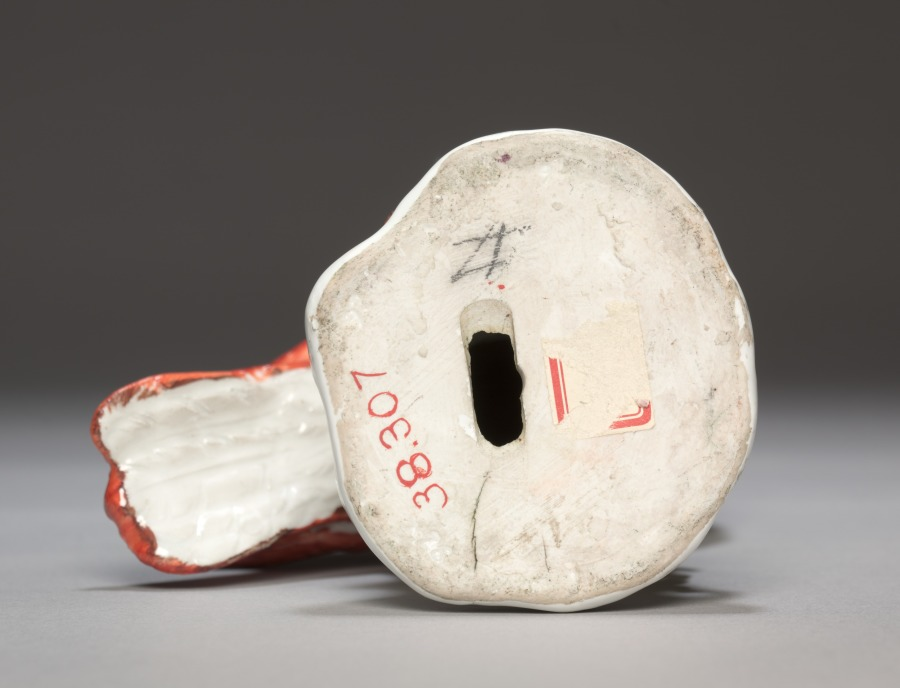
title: Candelabrum with Parrot (Parrot)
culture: Germany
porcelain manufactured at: Meissen Porcelain Factory (German, est. c. 1710)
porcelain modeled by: Johann Joachim Kändler (German, 1706–1768)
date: c. 1740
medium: porcelain mounted in gilt bronze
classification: Ceramic